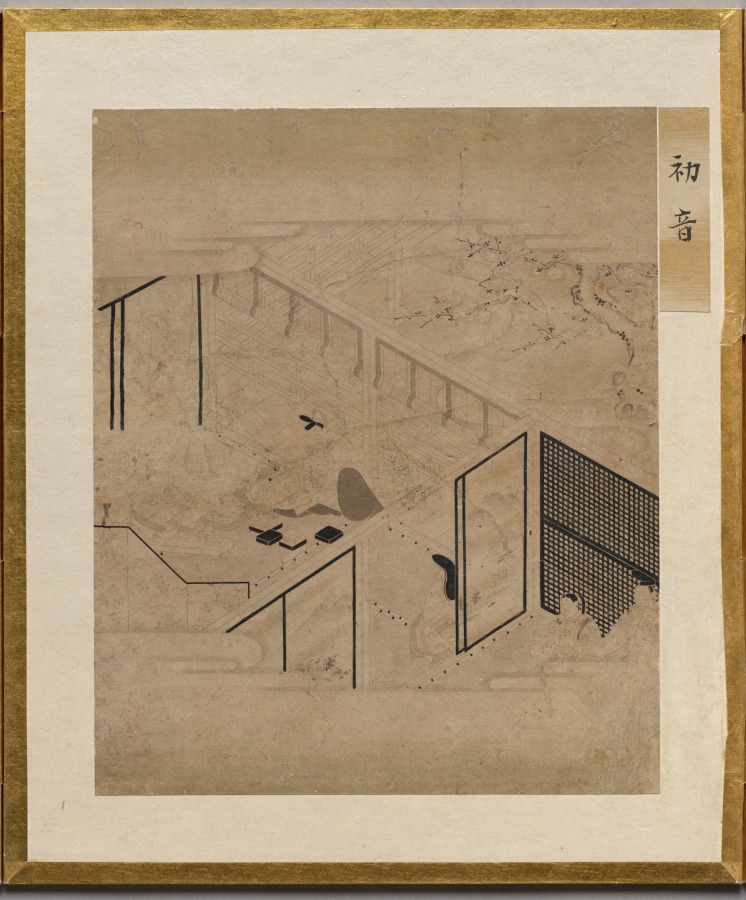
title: First Warbler from Album of Illustrations for the Tale of Genji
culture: Japan, Edo period (1615–1868)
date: 1600s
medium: painting in an accordion-style album; ink, light color, and gold on paper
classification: Bound Volume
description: This album contains illustrations for the classic literary work the Tale of Genji, authored in the 1000s by Murasaki Shikibu, an aristocrat of the Heian period (794–1185) court. The scenes are painted in the “white drawing” (hakubyō) mode, in which a fine ink line is used to depict figures and spaces with great subtlety, punctuated only occasionally by traces of red pigment for a character’s lips, a detail of a garment, or a decorative element. These two scenes illustrate episodes from the chapters “Thin Veil of Cloud” (Usugumo) and “Barrier Gate” (Sekiya).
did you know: The illustrations are identified by chapter title in cartouches to the upper right of the paintings.